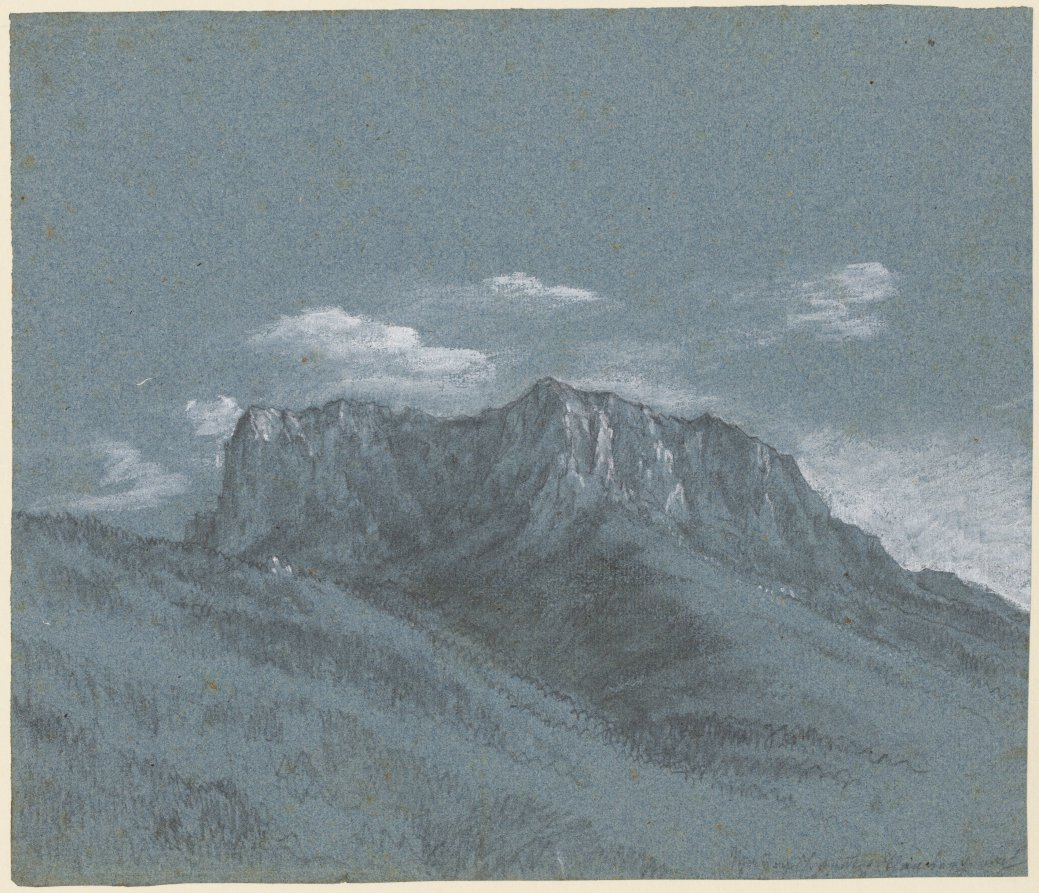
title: The Rauschberg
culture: Germany, 19th century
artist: Georg von Dillis (German, 1759–1841)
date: c. 1800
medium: black chalk, graphite, and white gouache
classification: Drawing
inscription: [by artist?], lower right, in graphite: M[illegible] Rauschberg [illegible] ; VERSO, along lower edge, in brown ink: M[illegible] ; along lower edge in graphite: [illegible] no. 9606 (9606 underlined)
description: Alongside his career as a connoisseur and art historian, Dillis drew and painted enthusiastically. Between 1808 and 1814 he was a professor of landscape painting at the Munich Academy. Most of his work consists of freely painted watercolors and oil sketches executed directly from nature. This atmospheric study of the staggeringly high Rauschberg mountain may have been influenced by English watercolors, with which Dillis was familiar.